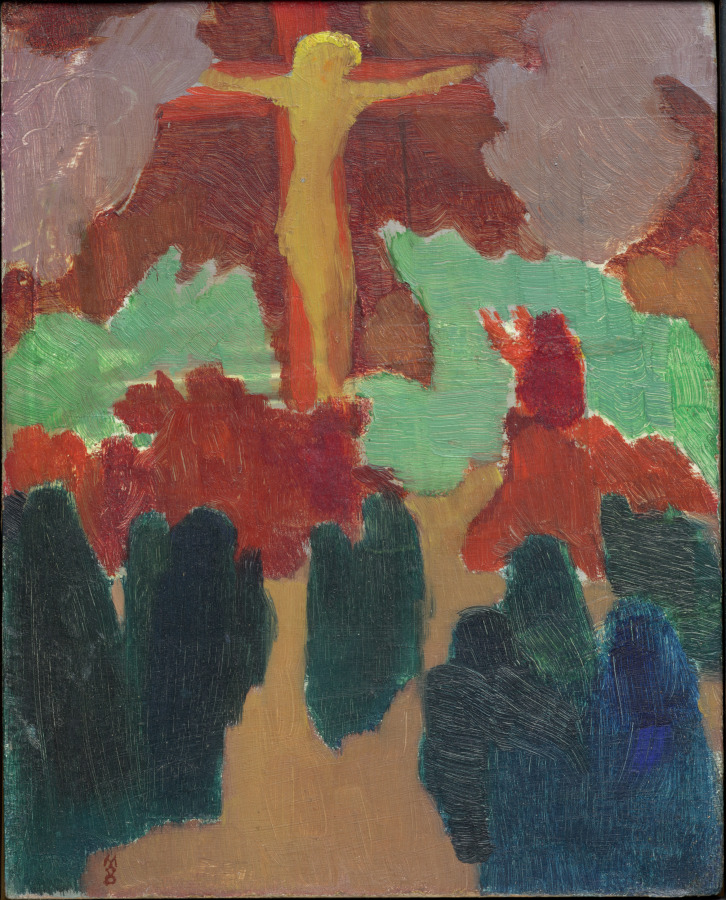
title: The Orange Christ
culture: France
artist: Maurice Denis (French, 1870–1943)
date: 1889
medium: oil on board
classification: Painting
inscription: vertical studio monogram, lower left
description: A devout Catholic, Maurice Denis sought to create what he described as “imperishable icons.” In this small painting, he used flat planes of intense colors to conjure emotion in the viewer. Here, a somber group of women, depicted as amorphous black forms, gather around an orange figure of Christ on the cross. The sky is a reddish-purple streaked with green clouds. Pink angels flank the crucified Christ whose head is haloed in brilliant yellow. In this painting, the daring young artist combined religious fervor with unprecedented visual experimentation.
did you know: As reflected in the two-dimensionality and color blocking in this painting, Denis believed a painting was "a flat surface covered with colors assembled in a certain order."